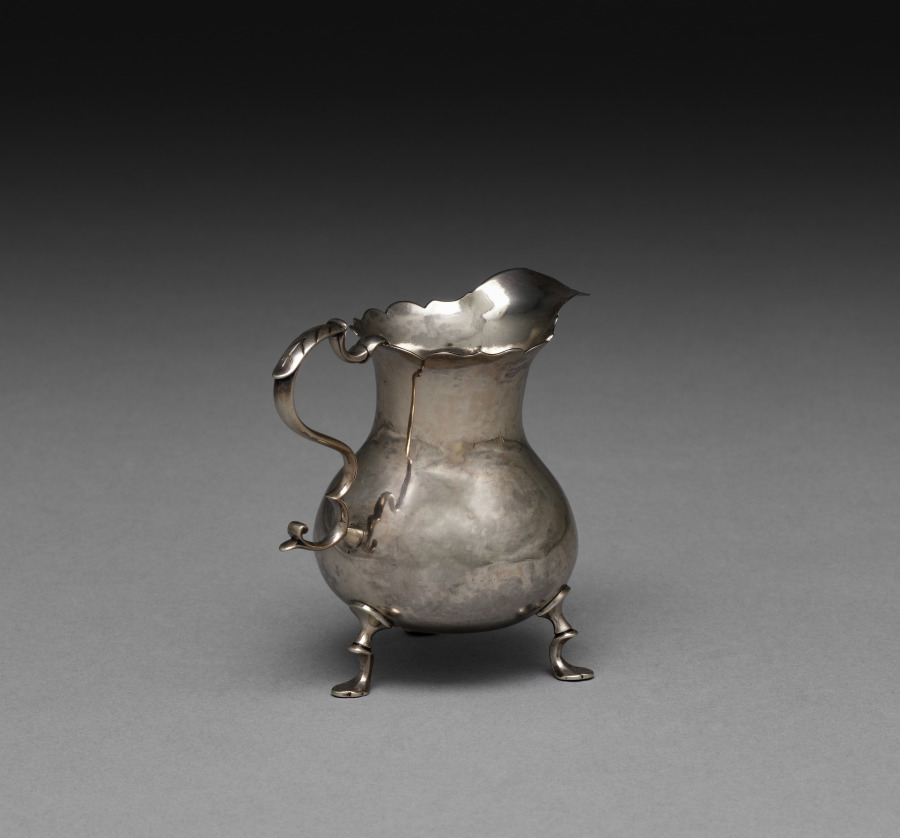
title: Cream Jug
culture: America, Rhode Island, 18th century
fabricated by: Samuel Casey (American, c. 1724–c. 1780)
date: c. 1750–1770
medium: silver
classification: Silver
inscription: engraved "P" over "R*L" in shaded block letters on bottom, just above mark. (The owner's initials, which appear to be original to the cream jug, have not been identified.)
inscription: Stamped underside: "S:CASEY".